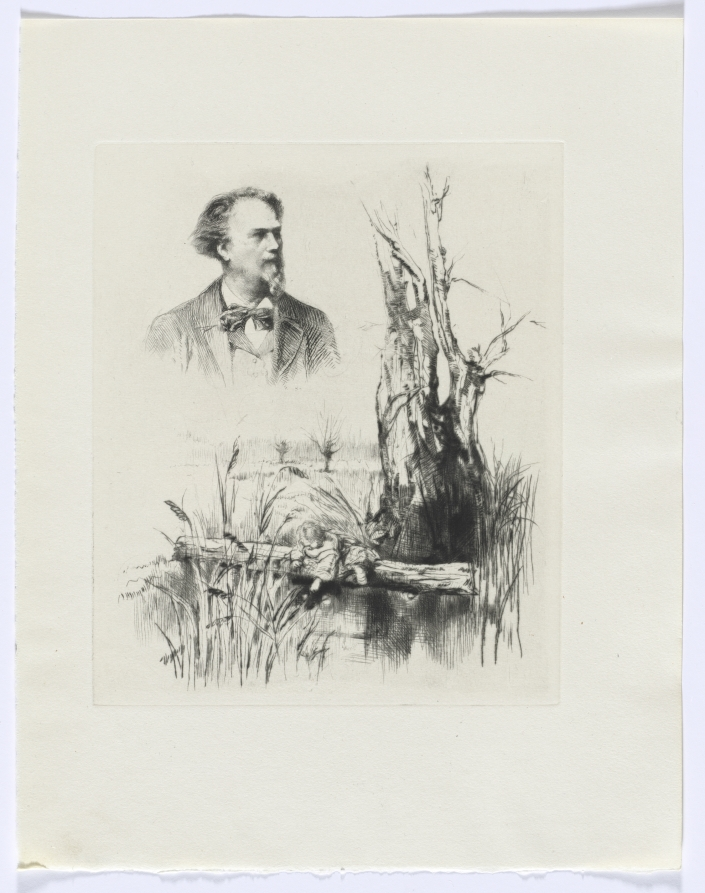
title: Frédéric Mistral: Mémoires et Recits by Frédéric Mistral: bust of a man and landscape with child (insert between p. 16-17)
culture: France, 20th century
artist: Auguste Brouet (French, 1872–1941)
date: 1937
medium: etchings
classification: Portfolio